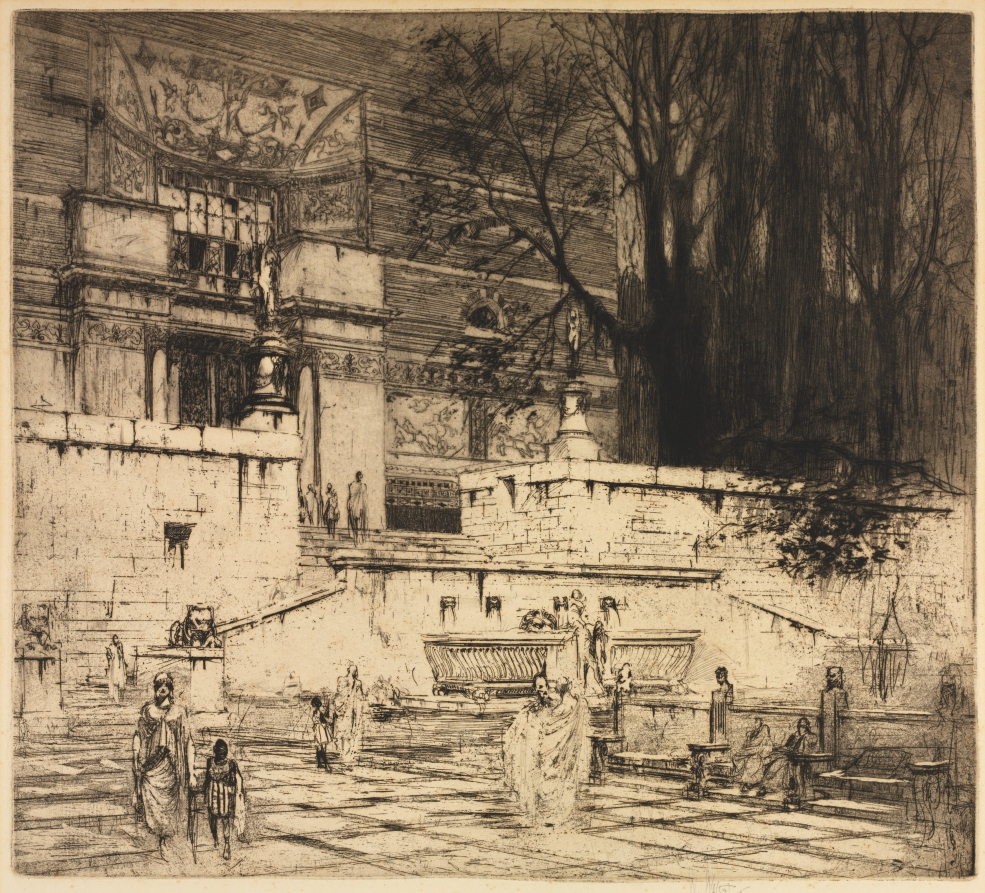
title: The Days of Ancient Rome: At the House of a Patrician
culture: England, 20th century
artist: William Walcot (British, 1874–1943)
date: 1913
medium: etching and drypoint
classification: Print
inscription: Lower right, in pencil: "W. Walcot"